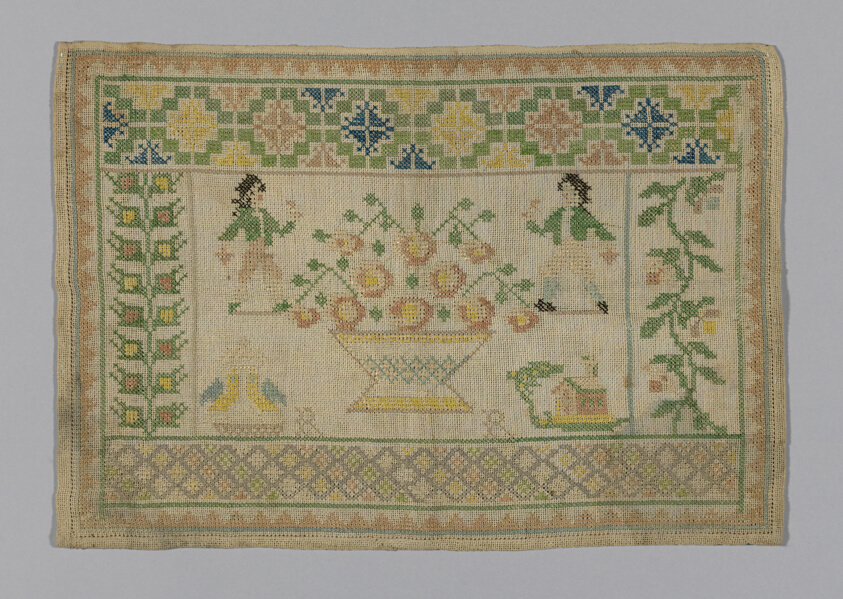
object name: Textile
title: Sampler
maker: France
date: 1775/1825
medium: Linen, plain weave; embroidered with silk in cross stitch; all edges finished in feathered hem stitch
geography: France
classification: textile; needlework (visual works); sampler